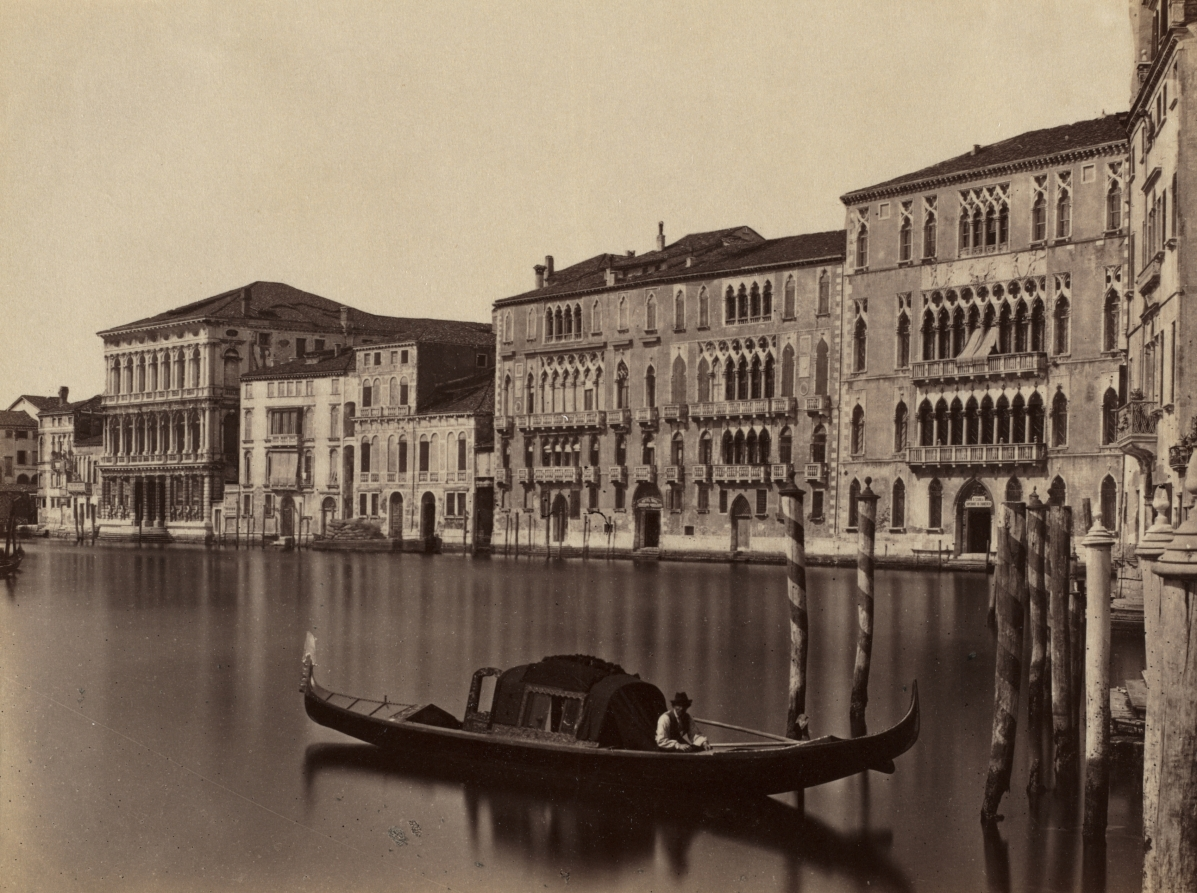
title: Untitled (Venetian Gondola)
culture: Italy, Venice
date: late 1800s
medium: albumen print from wet collodion negative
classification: Photograph